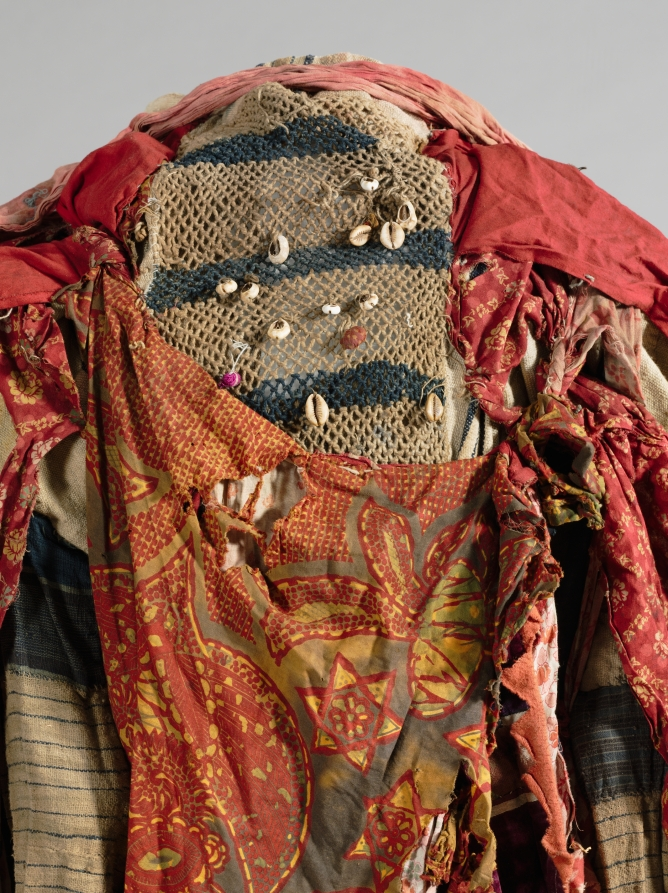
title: Egúngún Masquerade Dance Costume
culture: Africa, West Africa, Nigeria, Yorùbá-style maker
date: 1900s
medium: cotton, velvet, flannel, dye, faux fur, leather, cowrie shells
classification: Mask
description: Swirling into motion, egúngún masquerade costumes appear during annual festivities to bless the community. Manifesting ancestral spirits, they serve as a bridge between the living and the otherworld. The fabric panels create a dwelling place for ancestral spirits. Arranged and selected according to Yorùbá design sense (ojú-ọnà), this mask incorporates hundreds of African, Asian, and European fabrics. These include imported damasks, velvets, faux furs, and embroideries, as well as local indigo-dyed cottons.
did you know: The striped netting on the "face" of this masquerade costume allows the wearer to see out while keeping their identity concealed.